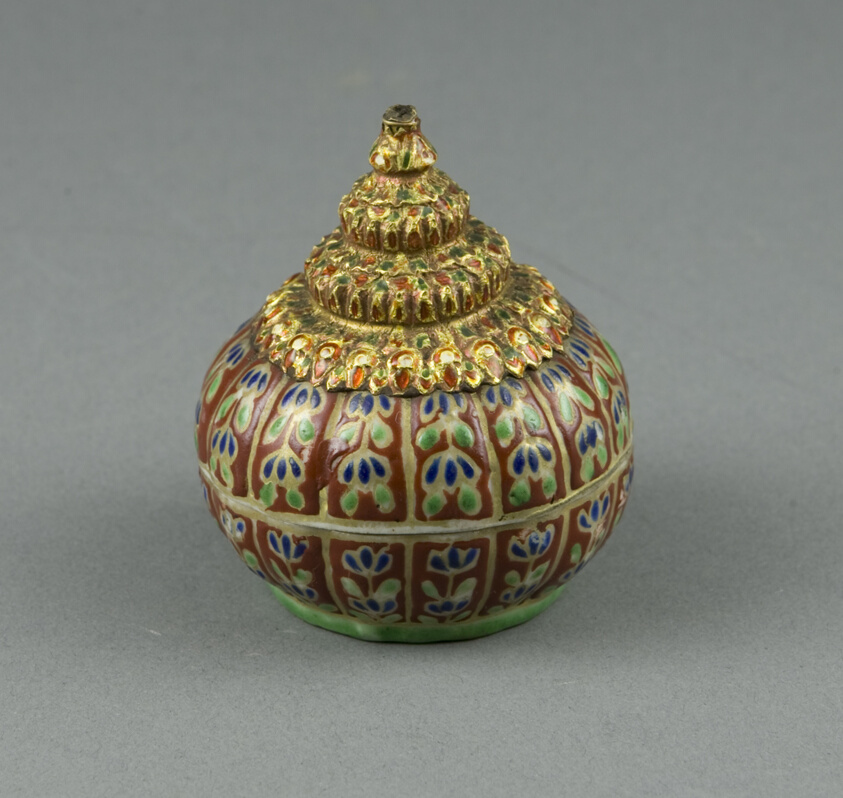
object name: Vessel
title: Lai Nam Thong (Gold-Washed) Ware, Miniature Jar with Tiered Cover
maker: China, for the Thai Market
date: 19th century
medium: Porcelain painted with gilt in overglaze polychrome enamels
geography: China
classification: porcelain; asian art; ceramics; vessel